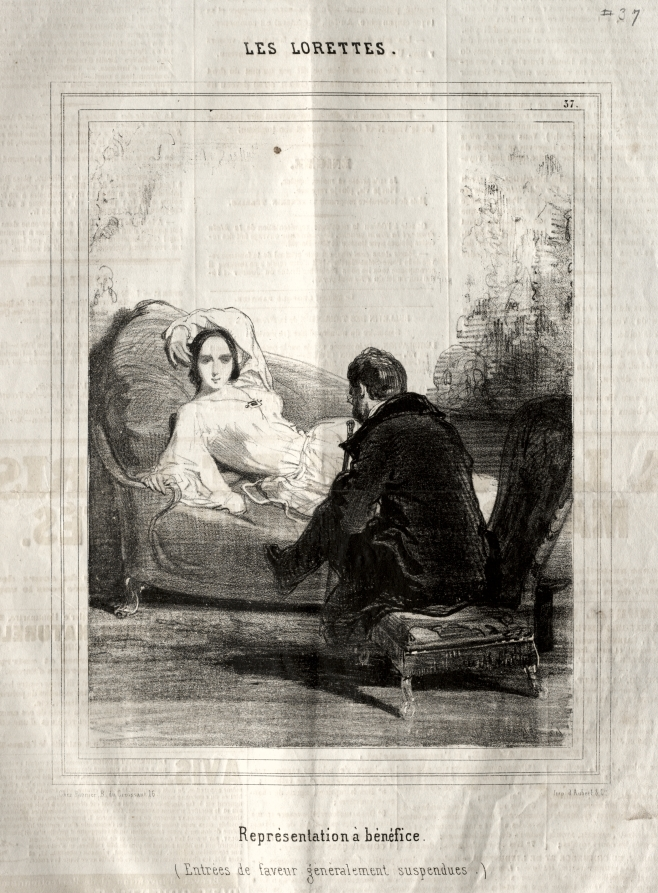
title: Les Lorettes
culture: France, 19th century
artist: Paul Gavarni (French, 1804–1866)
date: 1842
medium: lithograph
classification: Print